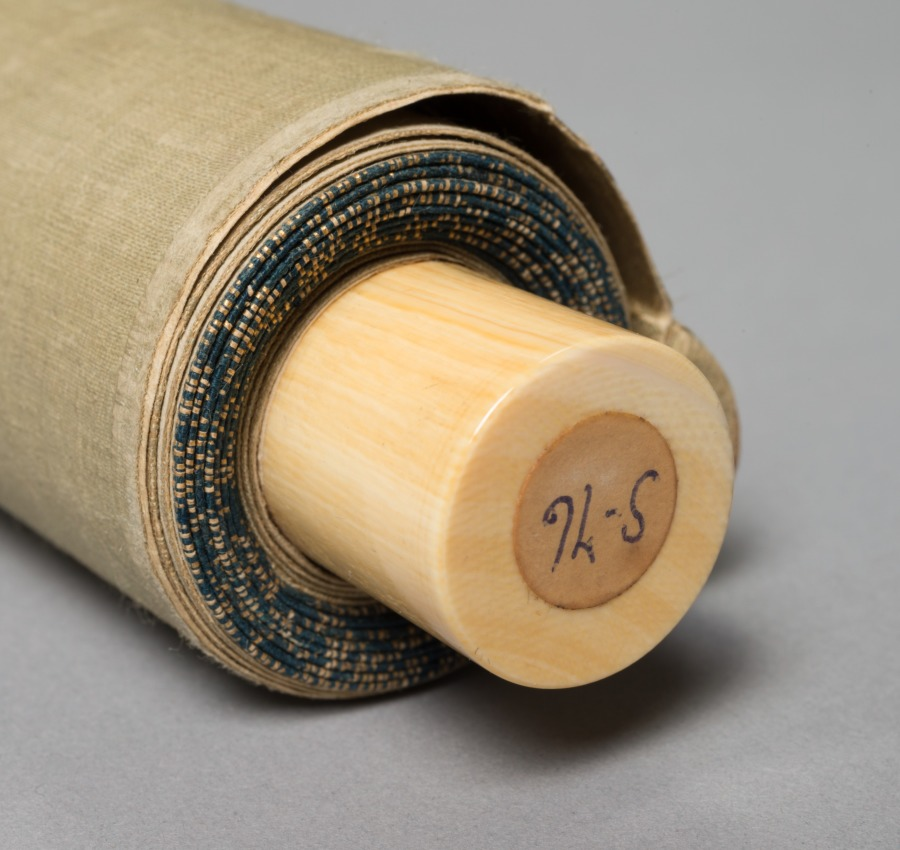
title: Seated Priest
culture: Japan, Momoyama period (1573-1615) to Edo period (1615-1858)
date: late 1500s-1650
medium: hanging scroll; ink on paper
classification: Painting